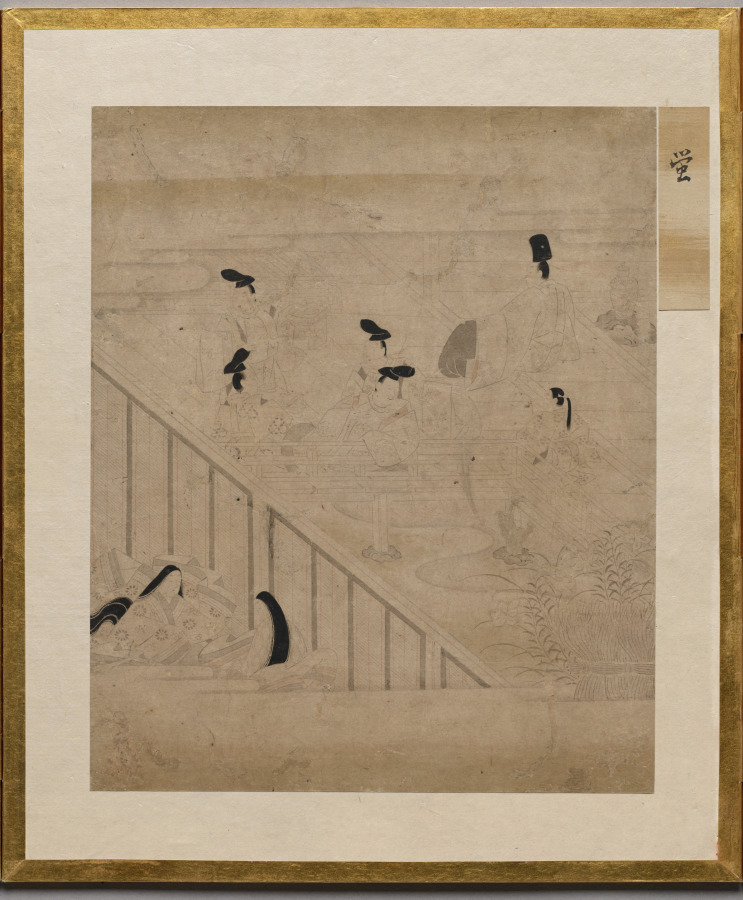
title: Fireflies from Album of Illustrations for the Tale of Genji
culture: Japan, Edo period (1615–1868)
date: 1600s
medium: painting in an accordion-style album; ink, light color, and gold on paper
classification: Bound Volume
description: This album contains illustrations for the classic literary work the Tale of Genji, authored in the 1000s by Murasaki Shikibu, an aristocrat of the Heian period (794–1185) court. The scenes are painted in the “white drawing” (hakubyō) mode, in which a fine ink line is used to depict figures and spaces with great subtlety, punctuated only occasionally by traces of red pigment for a character’s lips, a detail of a garment, or a decorative element. These two scenes illustrate episodes from the chapters “Thin Veil of Cloud” (Usugumo) and “Barrier Gate” (Sekiya).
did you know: The illustrations are identified by chapter title in cartouches to the upper right of the paintings.